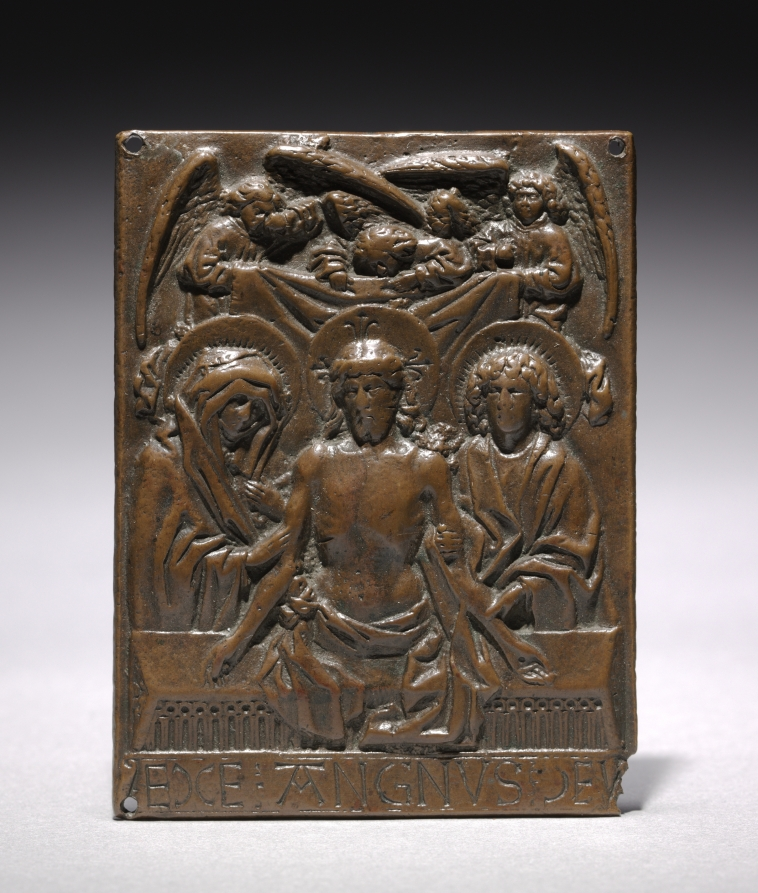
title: The Dead Christ Supported by the Virgin Mary and Saint John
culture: Germany, Ulm, 15th century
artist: Hans Multscher (German, c. 1400–1467)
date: 1427–1467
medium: bronze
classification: Sculpture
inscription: inscribed at base: "ECCE AGNUS DEI" (Behold the Lamb of God).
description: Inscribed on the base are the words ECCE AGNUS DEI (Behold the Lamb of God). Multscher was a prominent and successful sculptor from the Bavaria region who operated a large and prolific workshop with as many as 16 assistants. He worked in many materials and his work reflects a deep knowledge of Flemish realism, particularly that of Claus Sluter.